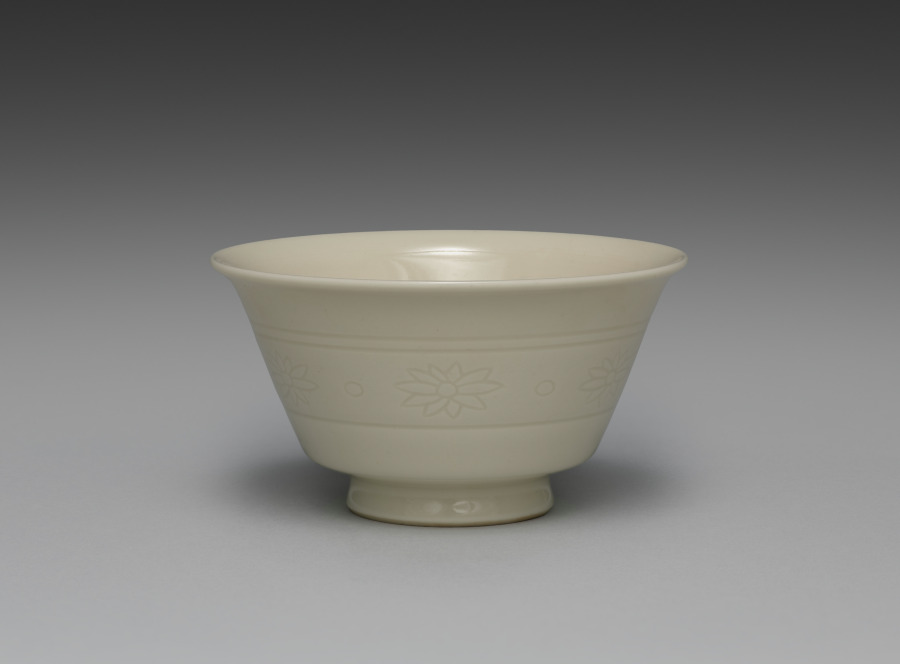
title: Teacup from Teacups with Floral Band Motif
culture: Japan, Meiji period (1868–1912)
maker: Seifū Yohei III (Japanese, 1851–1914)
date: 1893–1914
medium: One from a set of five cups; porcelain with incised decoration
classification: Ceramic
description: The five sencha teacups in this set are decorated with incised flowers and dots between a double band at the top and a single band at the bottom. They are in Yohei III’s creamy taihakuji body and glaze. In their motifs, they are quite similar to an incense burner by Yohei III (see CMA 2022.180), but the flowers are even more simple in design, with no open circle at the center. A label affixed to the side of the box refers to them as “sencha cups in emulation of Korean white [ware].” The reference to Korean ware indicates that even though Yohei was more directly inspired by Qing-dynasty wares from the Dehua kilns in Fujian Province in developing his porcelain clay and glaze for works such as these, the general understanding of the continental models still placed them, at least in terms of color, among pieces broadly associated in Japan with Korean white wares. The delicate cups are thinly potted, so they have a highly desirable translucency.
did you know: The delicate cups in this set are thinly potted, so they have a highly desirable translucency.